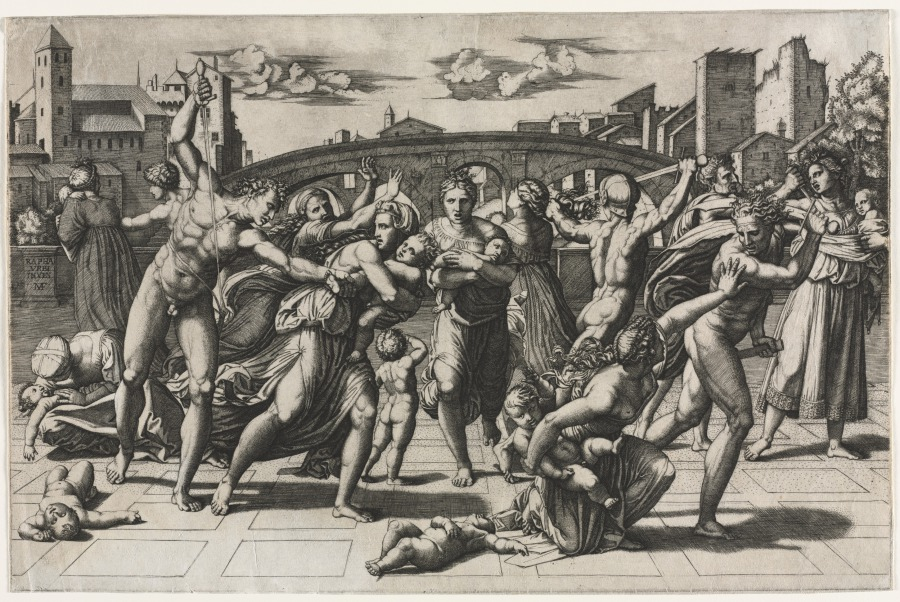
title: The Massacre of the Innocents (Without the Fir Tree)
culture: Italy, 16th century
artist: Marcantonio Raimondi (Italian, 1470/82–1527/34)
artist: after Raphael (Italian, 1483–1520)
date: about 1511–12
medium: engraving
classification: Print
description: Raphael drew this composition to be engraved by Marcantonio Raimondi while working in the Vatican apartments adjacent to Michelangelo, who was then painting the Sistine Chapel ceiling. The emotive scene portrays a moment from the biblical Book of Matthew when King Herod, hearing of the birth of a savior, ordered the execution of all male children under two years of age. Known for the clarity and balance of his forms and compositions, the younger Raphael may have found inspiration for this composition in Michelangelo’s narrative intensity and active, twisting nude forms.